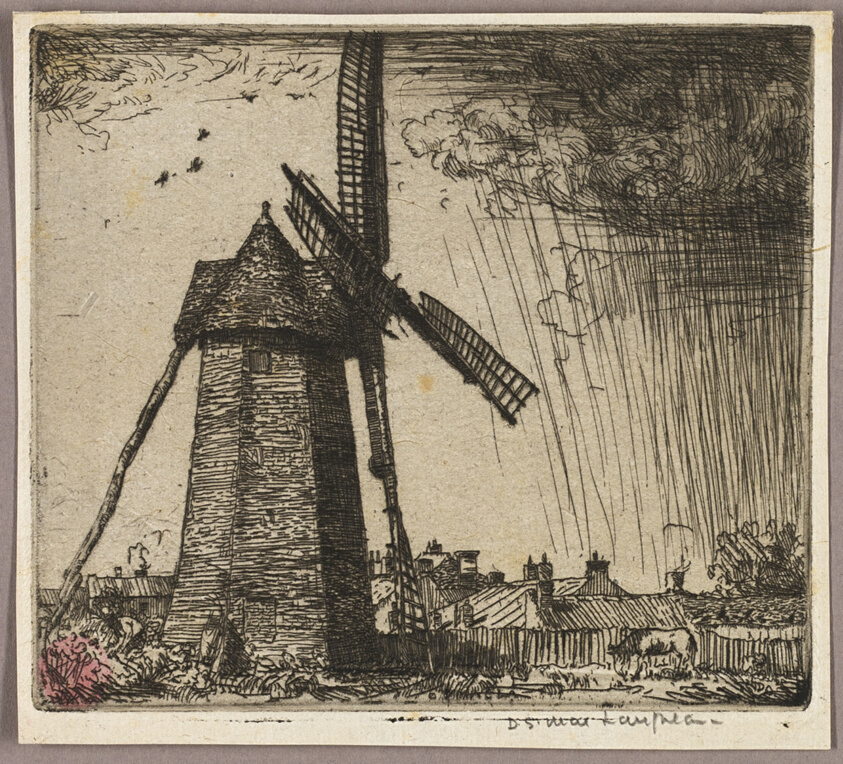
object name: Print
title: The Windmill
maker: Donald Shaw MacLaughlan (American, born Canada, 1876-1938)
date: 1902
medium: Etching in black on ivory wove paper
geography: United States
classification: etching; paper; print; prints and drawing